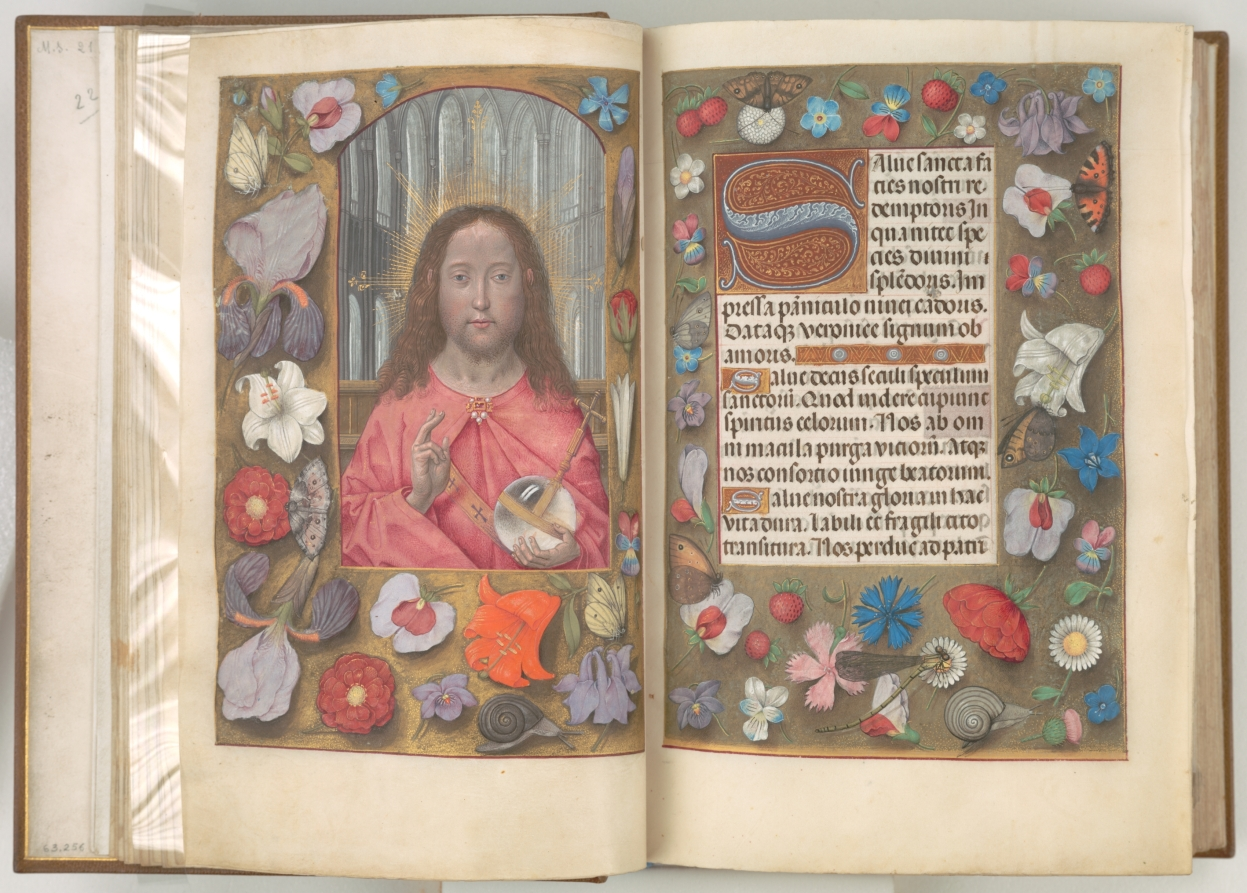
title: Hours of Queen Isabella the Catholic, Queen of Spain: Fol. 14v, Salvator Mundi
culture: Flanders, Ghent and Bruges, late 15th century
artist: Master of the First Prayerbook of Maximillian (Flemish, c. 1444–1519)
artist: and Associates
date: c. 1500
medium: ink, tempera, and gold on vellum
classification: Bound Volume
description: This manuscript was illuminated by a circle of at least five highly organized manuscript painters active in the Flemish cities of Ghent and Bruges. The principal illuminator was Alexander Bening, who painted the majority of the book's miniatures. Manuscripts produced by this circle of artists are renowned for the decoration of their borders, which typically feature a rich variety of realistically-painted flowers, birds, and butterflies. This prayer book, called a book of hours, was intended not for a cleric, but for the private devotions of a lay person-in this case, Isabella the Catholic, Queen of Spain (1451-1504). Isabella's coat of arms embellishes the book's frontispiece. It is unlikely that the book was commissioned by the Queen herself; rather, she probably received it as a diplomatic gift from someone courting her patronage, perhaps Cardinal Francisco Jimenez de Cisneros. A Franciscan friar, Jimenez was dependent upon Isabella for his advancement, first to the post of Queen's confessor in 1492, and then to Archbishop of Toledo in 1495.